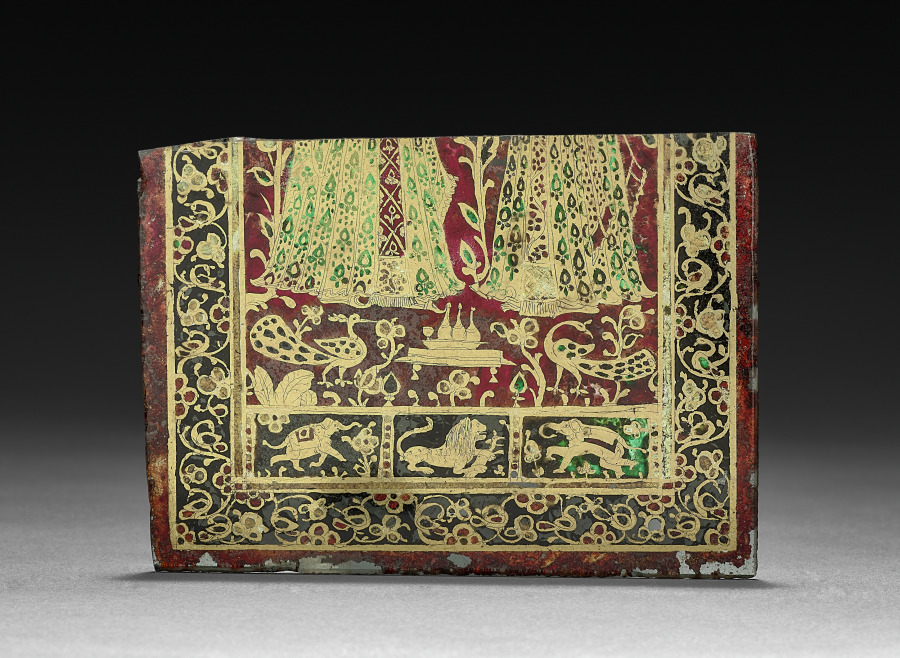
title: Fragment of the Reverse Side of a Mirror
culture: India, probably Jaipur, 18th century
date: 1700s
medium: gilded and enameled glass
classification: Glass